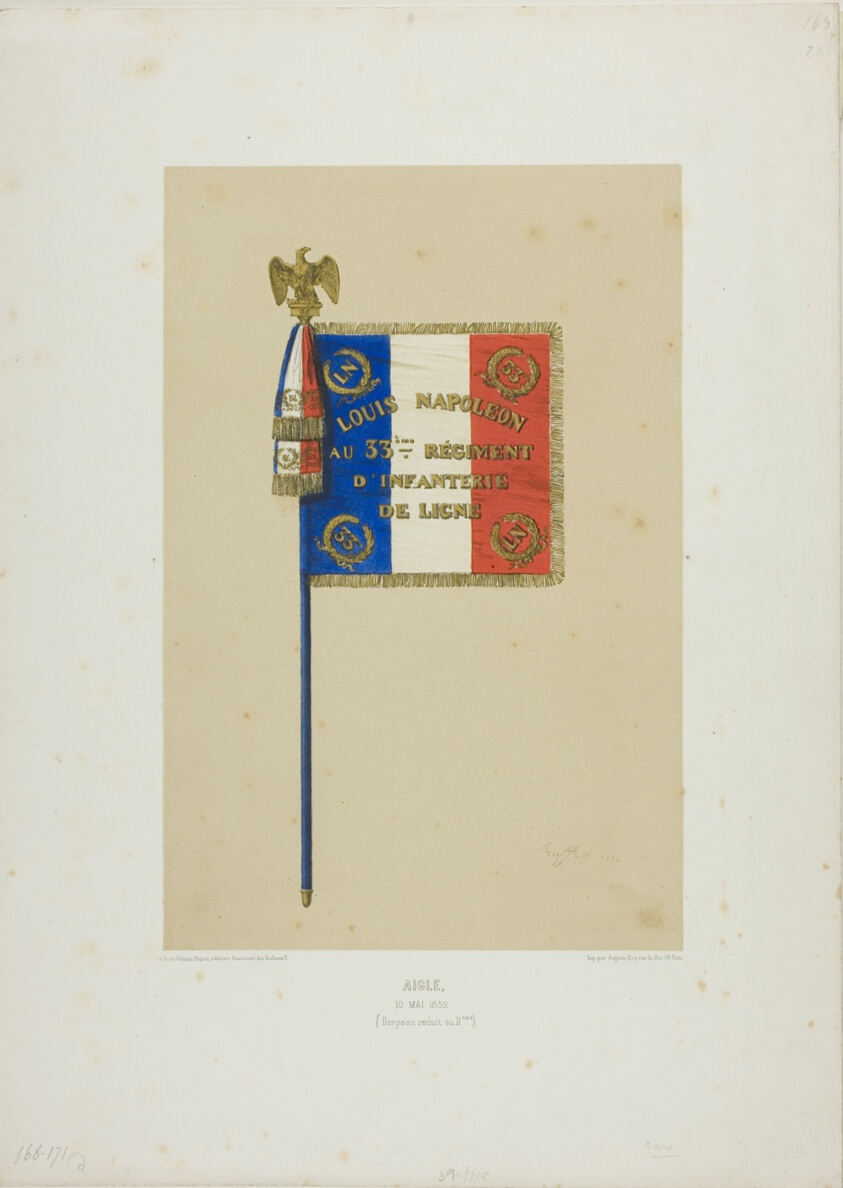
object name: Print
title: Standard: Louis Napoleon to the 33rd Infantry Line Regiment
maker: Denis Auguste Marie Raffet (French, 1804-1860); printed by Auguste Bry (French, 19th century); published by Éditeur Ernest Bourdin (French, active 19th century)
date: May 10, 1852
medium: Color lithograph in fawn, red, blue, gold and black from multiple stones on ivory wove paper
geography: France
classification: lithograph; print; prints and drawing